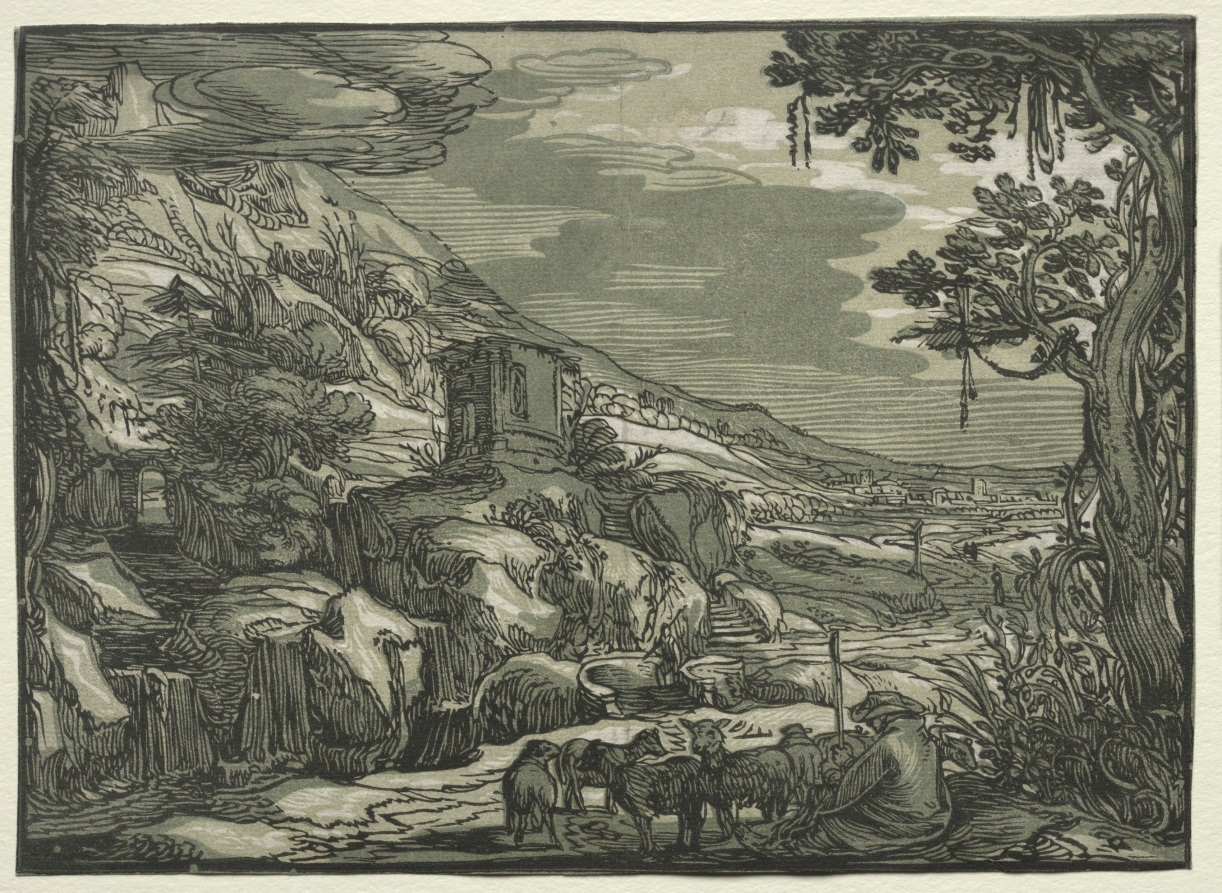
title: Arcadian Landscape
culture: Netherlands, 16th century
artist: possibly after Esaias van de Velde (Dutch, 1587–1630)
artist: possibly after Jan van de Velde II (Dutch, 1593–1641)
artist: sometimes attributed to Hendrick Goltzius (Dutch, 1558–1617)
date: c. 1615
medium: chiaroscuro woodcut (lineblock and two toneblocks, dark and light green)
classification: Print